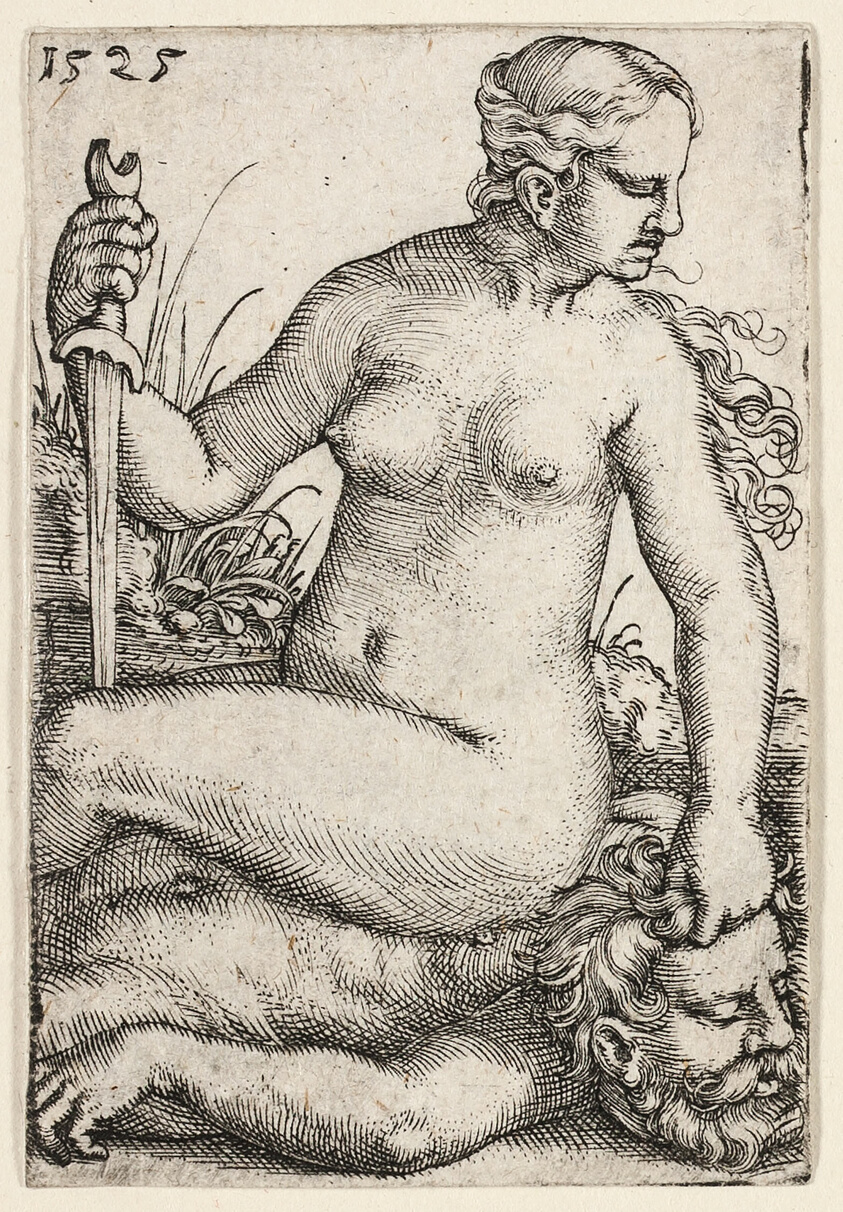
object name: Print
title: Judith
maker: Barthel Beham (German, 1502-1540)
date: 1525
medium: Engraving in black on ivory laid paper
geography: Germany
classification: engraving; print; prints and drawing